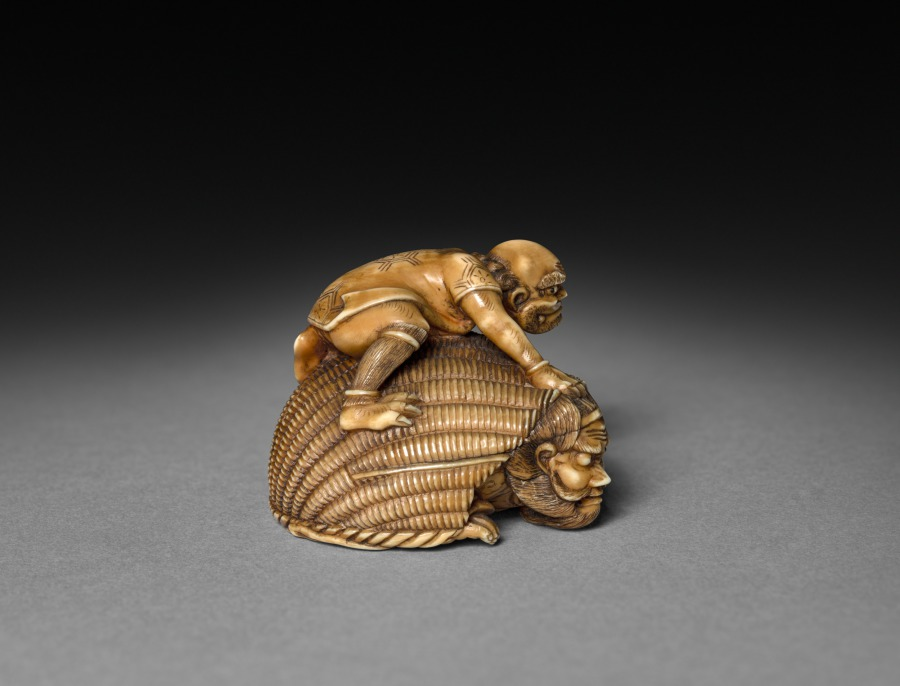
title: Demon Covering Shoki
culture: Japan, Edo period (1615–1868)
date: early to mid-1800s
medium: ivory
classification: Netsuke